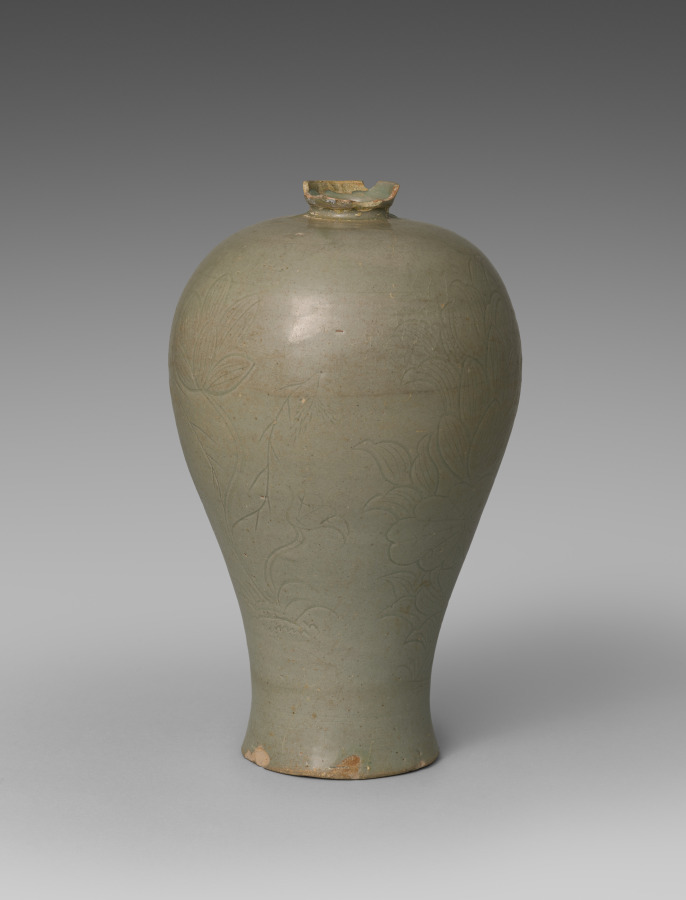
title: Prunus Vase with Incised Peony Design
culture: Korea, Goryeo dynasty (918–1392)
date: 1100s-1200s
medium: celadon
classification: Ceramic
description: As early as the seventh century, the practice of drinking tea and wine became an important part of elite culture in Korea. Once used to store alcoholic beverages, this type of vase features a wide body followed by a sharply rounded shoulder, a short neck and a small opening. Most of the remaining examples no longer have a lid, but originally it may have had a lid that not only covered the opening, but also served as a cup.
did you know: Prunus vases are often believed to contain a branch of plum blossoms, but recent researches reveal that these vases with a lid also were used to contain cooking liquid such as sesame oil.